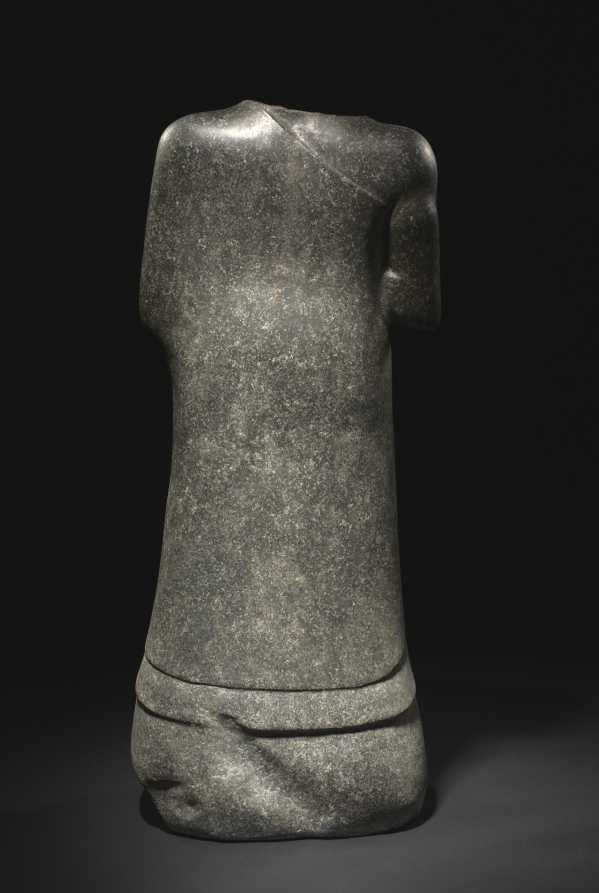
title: Statue of Gudea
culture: Mesopotamia, Neo-Sumerian, Iraq, Girsu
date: c. 2144–2124 BCE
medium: dolerite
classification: Sculpture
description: This headless figure’s clasped hands create a distinctive gesture that recurs frequently on more than 30 recorded statues of the Mesopotamian ruler Gudea. Between c. 2144–2124 BCE, Gudea ruled as ensi (governor) of the city-state of Lagash, located in modern-day Iraq. Scholars have identified more than 2,400 inscriptions that describe his reign, which included patronage of the arts and an extensive building program. Statues like this one would have been placed in temples as stand-ins for Gudea himself, demonstrating his devotion and piety.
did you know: Twice in the 20th century, this headless figure was wrongly "completed" with the head 1963.680, which comes from a similar sculpture.